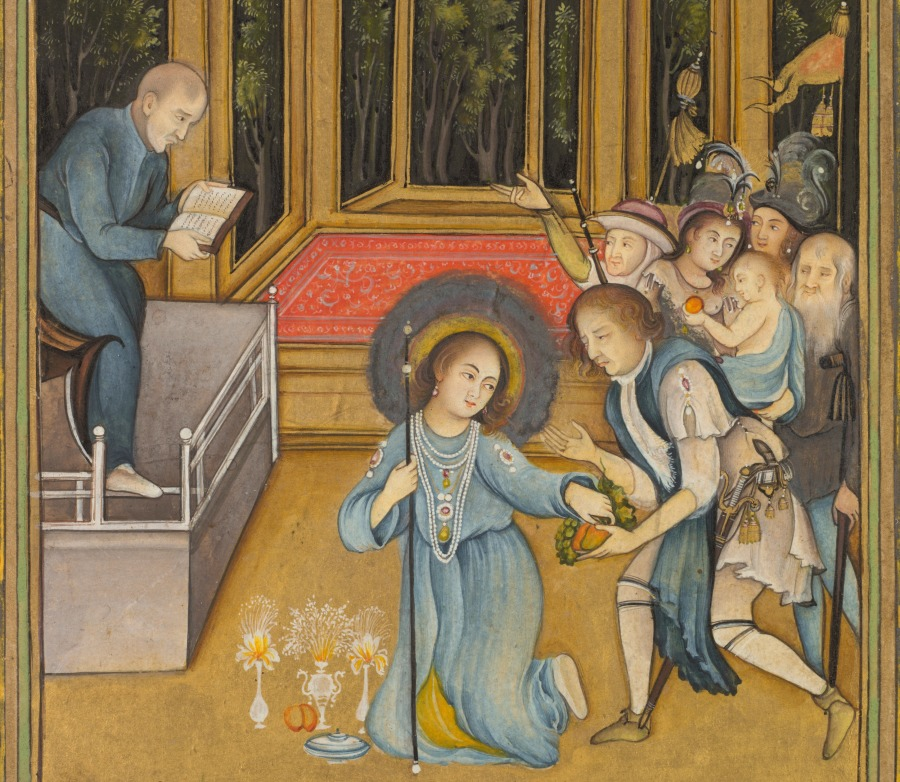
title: Jesus among the doctors in the Temple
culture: India, Lucknow, Mughal, 18th century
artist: Mir Kalan Khan (Indian, c. 1730–1775)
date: c. 1760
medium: Gum tempera and gold on paper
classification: Painting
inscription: Persian inscription on verso: an image of Blessed Miriam, work of Mir Kalan Khan